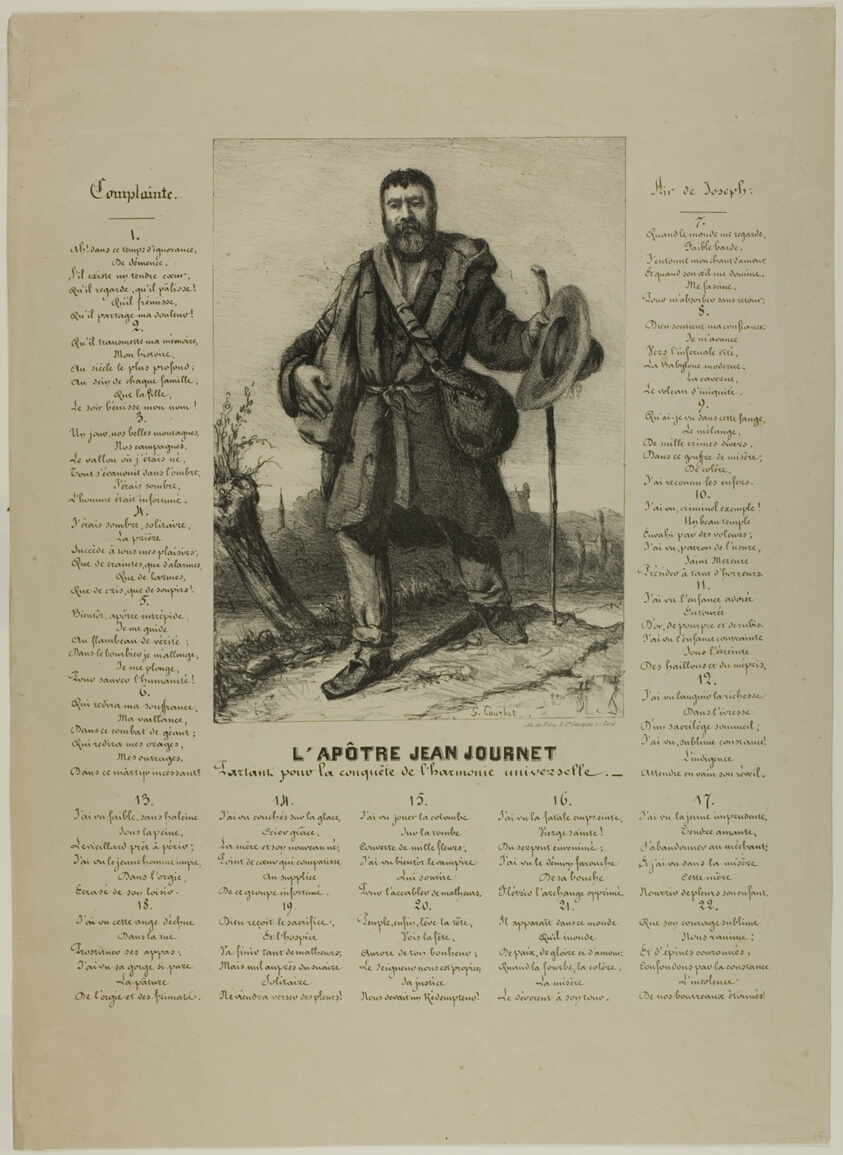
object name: Print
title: The Apostle Jean Journet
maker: Gustave Courbet (French, 1819-1877)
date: 1850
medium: Lithograph in black on wove paper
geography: France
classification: lithograph; print; prints and drawing